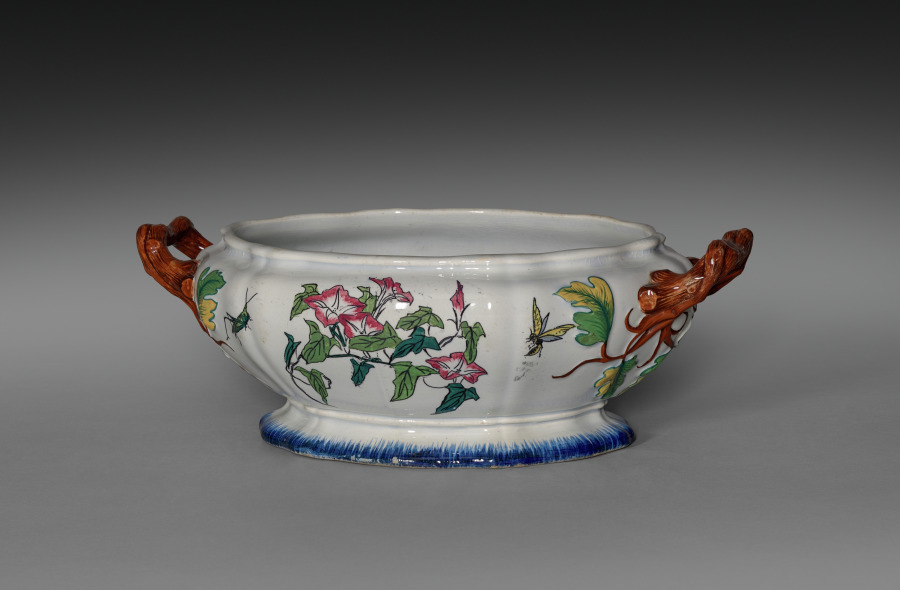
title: Tureen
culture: France, Creil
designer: Félix Bracquemond (French, 1833–1914)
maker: Creil Factory (French)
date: 1866–75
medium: porcelain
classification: Ceramic